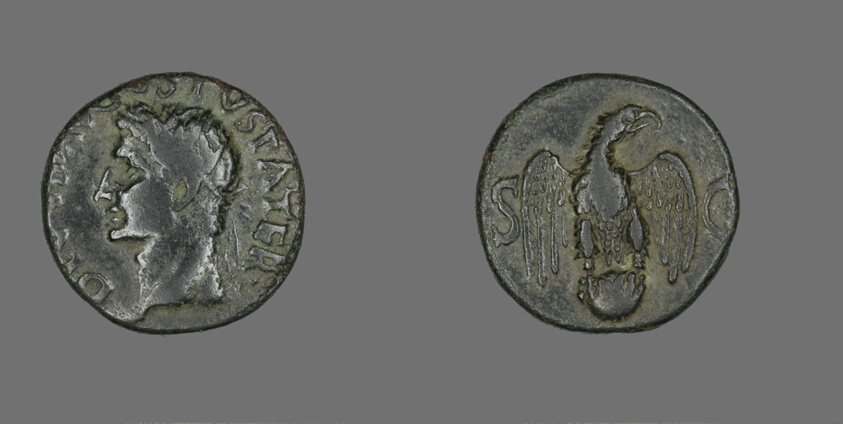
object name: Coin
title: As (Coin) Portraying Emperor Augustus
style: roman (ancient, style or period)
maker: Roman, minted in Rome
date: 34-37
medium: Bronze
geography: Roman Empire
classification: coin; ancient art